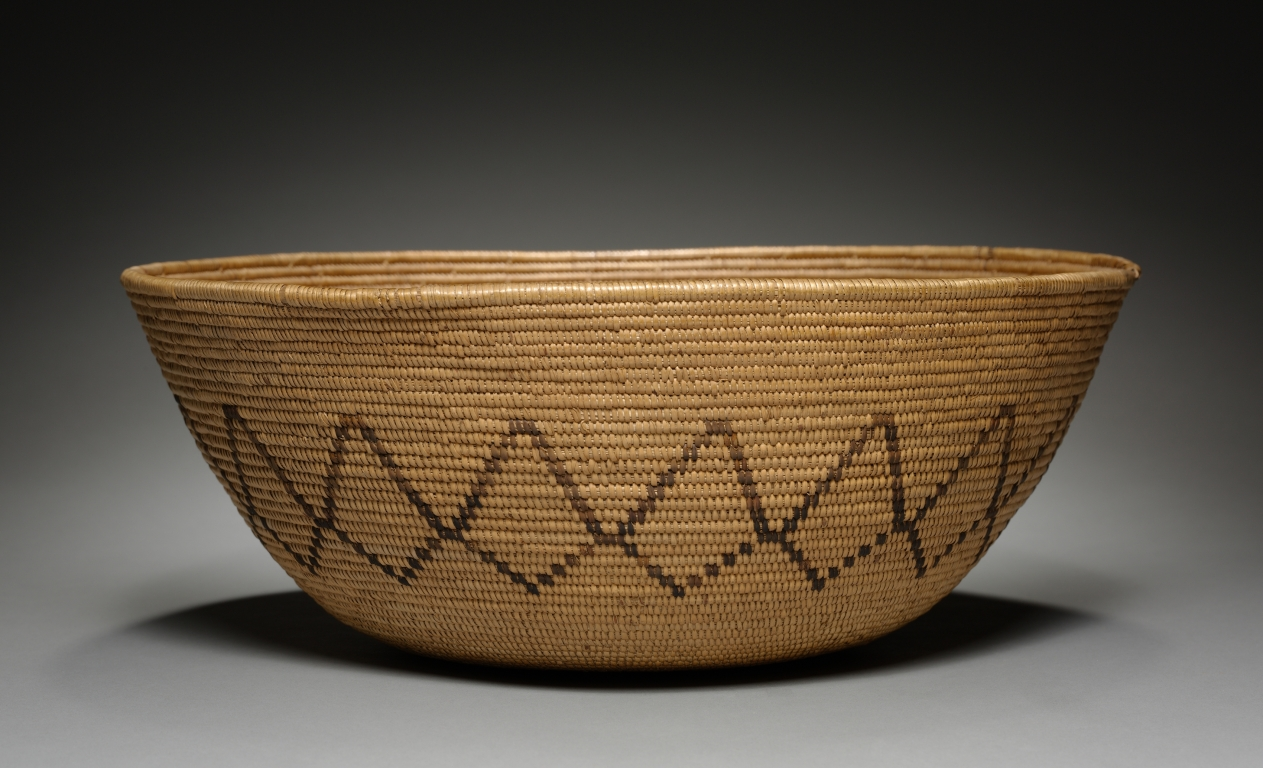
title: Bowl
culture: California, Southern, Gabrielino (San Gabriel, Mission or Tongva), Late 19th- Early 20th century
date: c 1875– 1925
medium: coiled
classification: Basketry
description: CMA Bulletin, December 1930